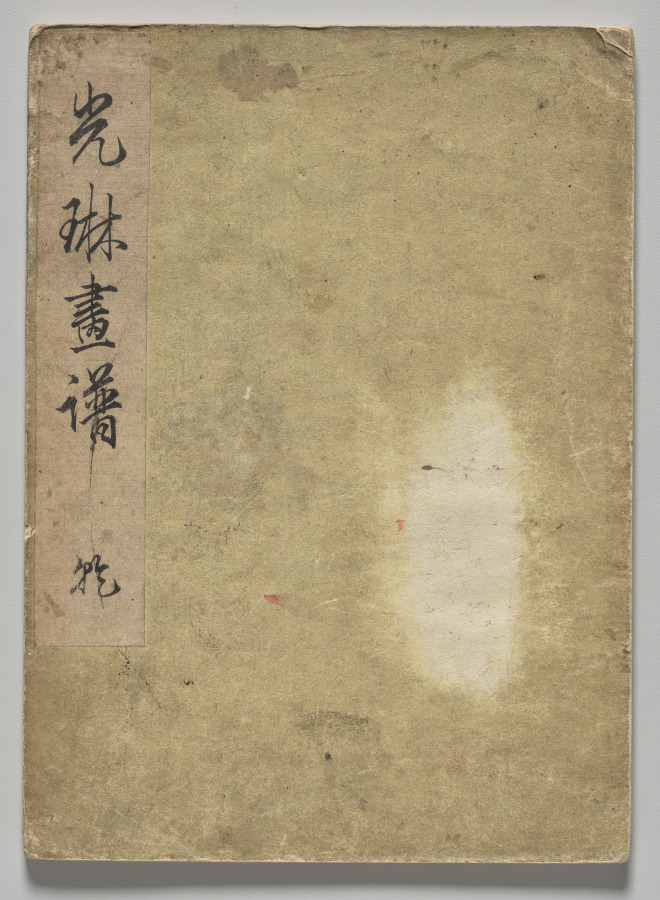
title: The Kōrin Picture Book (Volume 2)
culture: Japan, Edo period (1615–1868)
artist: Nakamura Hōchū (Japanese, d. 1819)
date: 1800s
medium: One of a set of two woodblock printed folding-books; ink and color on paper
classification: Bound Volume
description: Ogata Korin (1658-1716) was one of the most admired artists of Rimpa, or "decorative school painting." These books by the charming later-generation Rimpa artist Hochu record Korin's inventive designs.